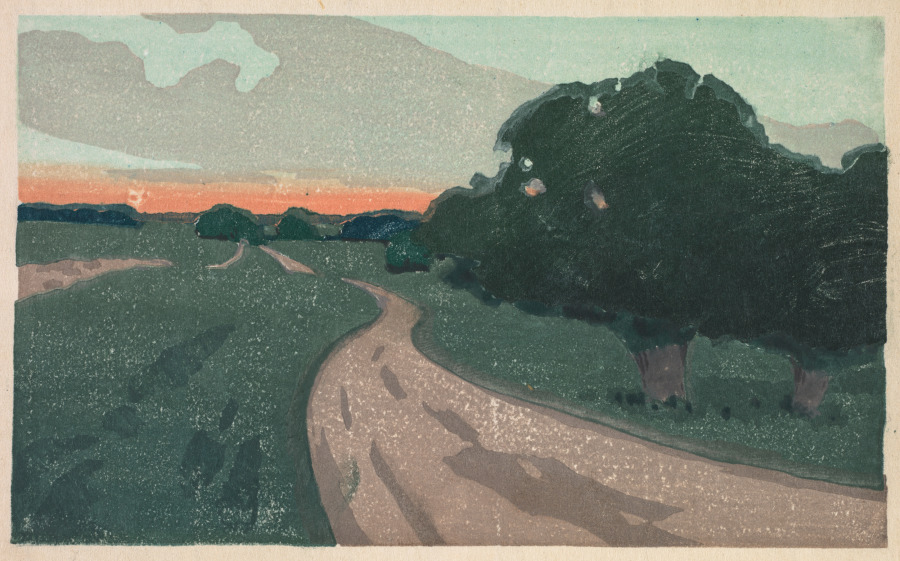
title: The Long Road or Argilla Road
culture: America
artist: Arthur Wesley Dow (American, 1857–1922)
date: c. 1898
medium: Color woodcut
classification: Print